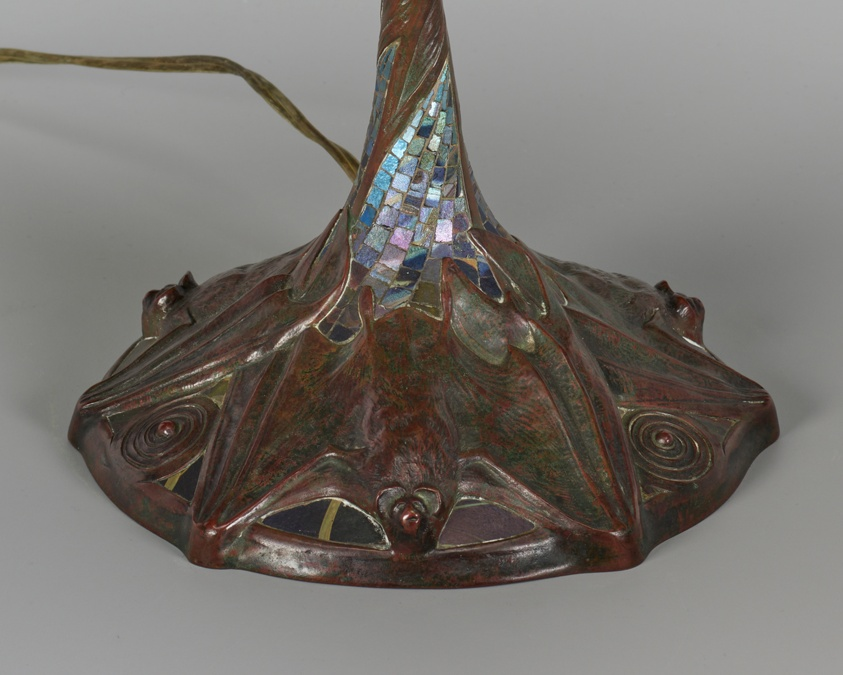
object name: Furnishings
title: Lamp with “Heavy Ribs” Shade and “Bat” Base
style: Arts and Crafts Movement, 20th Century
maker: Tiffany Studios (American, 1902–32); Corona, New York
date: c. 1905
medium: Favrile glass, leaded glass, and bronze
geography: Corona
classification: lamp (lighting device); american decorative arts; decorative arts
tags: bats, mosaic, spiders, spiderwebs